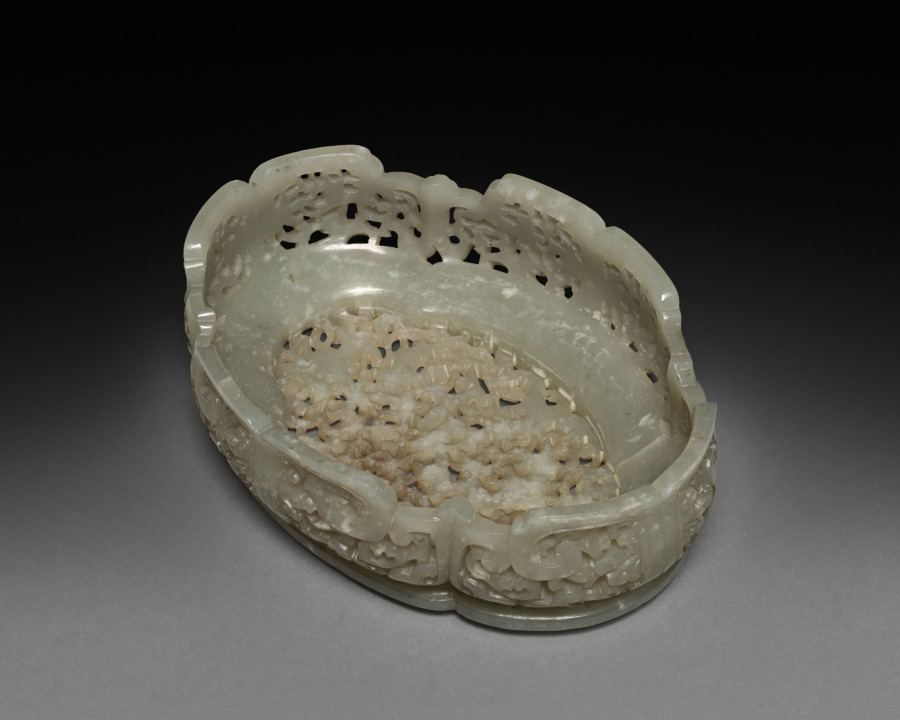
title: Octofoil Dish with Three Boys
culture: China, Qing dynasty (1644–1911), Qianlong reign (1736–95)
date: 1700s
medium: jade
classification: Jade